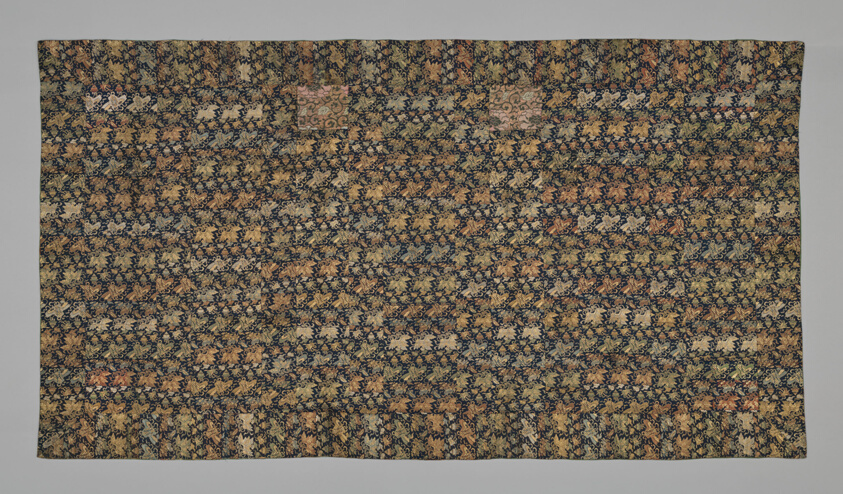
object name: Textile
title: Kesa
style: meiji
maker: Japan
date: Meiji period (1868–1912), late 19th century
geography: Japan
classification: textile; costume; liturgical - buddhist; weaving